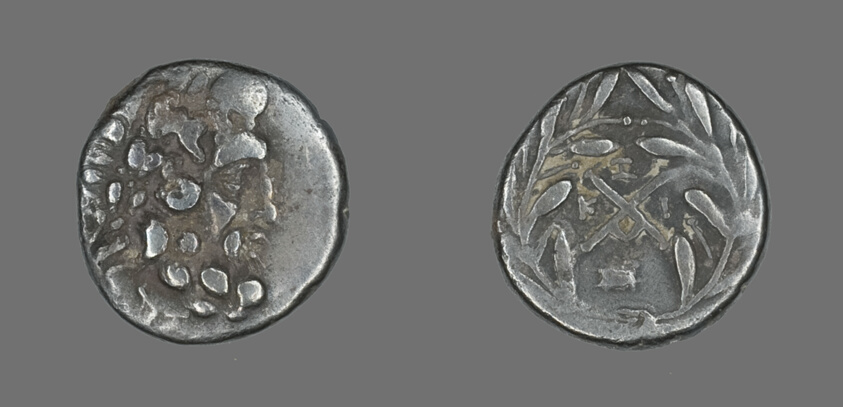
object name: Coin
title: Hemidrachm (Coin) Depicting the God Zeus Amarios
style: greek, ancient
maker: Greek, minted in Megalopolis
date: 234-146 BCE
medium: Silver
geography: Megalópolis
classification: coin; ancient art